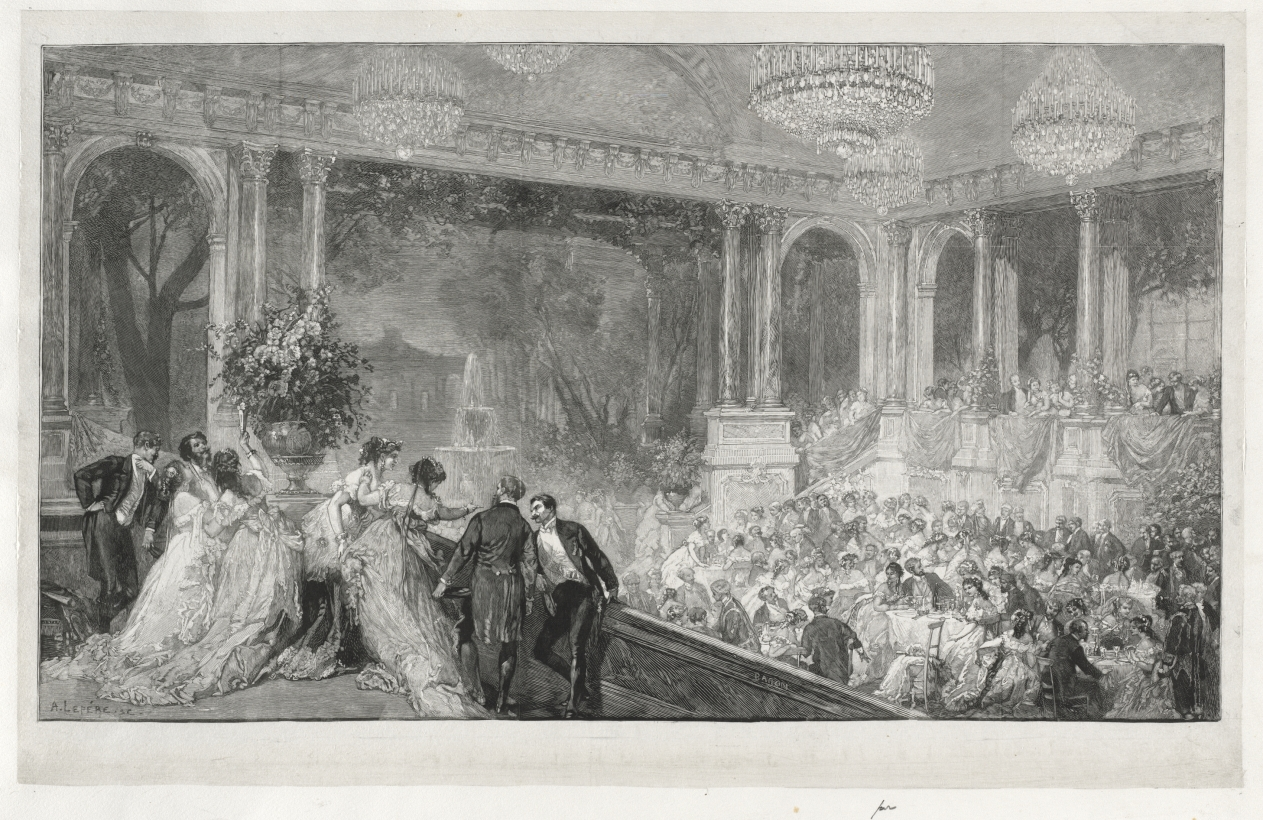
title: Festival at the Tuilleries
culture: France, 19th century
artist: Auguste Louis Lepère (French, 1849–1918)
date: 1887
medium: wood engraving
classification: Print